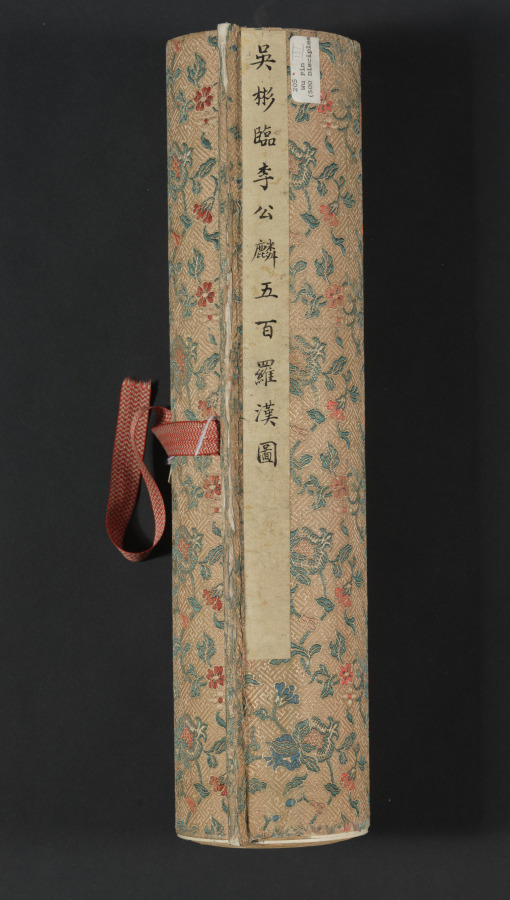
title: The Five Hundred Arhats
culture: China, Ming dynasty (1368–1644)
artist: Wu Bin (Chinese, active c. 1591–1626)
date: 1591–1626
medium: Handscroll; ink and color on paper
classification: Painting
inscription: 枝隱頭陀吳彬齋心拜寫 [印]吳彬之印; 文中父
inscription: 7 seals of Qianlong emperor (r. 1736–95): Gu xi tian zi 古希天子; Shou 壽; Qianlong jian shang 乾隆鑑賞; San xi tang jing jian xi 三希堂精鑑璽; Yi zi sun 宜子孫; Tai shang huang di zhi bao 太上皇帝之寳; Qian qing gong bao 乾清宮寶.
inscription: 6 seals of Cheng Qi 程琦 (1911–1988): Ke an geng zi wu shi yi hou suo de ming ji 可菴庚子五十以後所得名跡; 5 other Cheng Qi seals.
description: More than 66 feet long, this handscroll depicts 447 luohans, 72 attendants, and the bodhisattva of compassion at its very end. Luohans (arhats in Sanskrit), disciples of the Buddha and protectors of the Buddha’s law, possess supernatural powers and take on myriad external appearances. The amusing assortment of characters are engaged in an array of religious, secular, and miraculous activities. The painter used stylistic features borrowed from earlier artists, carefully controlled lines, and refined coloring. Wu Bin was a lay Buddhist and depicting this sort of image was part of a religious practice seeking understanding of the Buddha’s teaching.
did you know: Far advanced on the path to enlightenment, arhats have the capacity to tame tigers, free dragons, and to float on water or in the air.